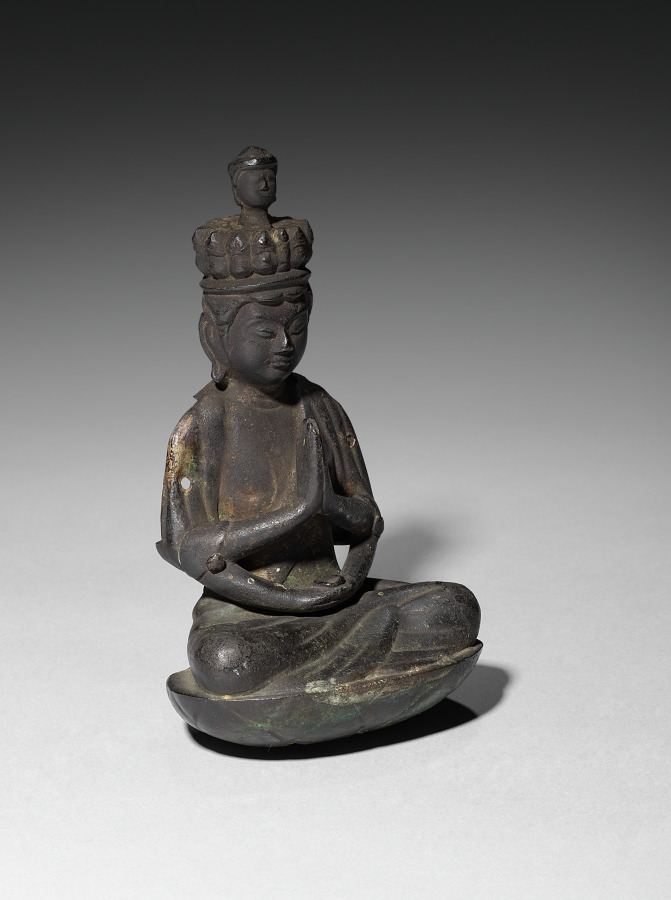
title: Eleven-Headed Kannon (Jūichimen Kannon)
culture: Japan, Heian period (794–1185) to Kamakura period (1185–1333)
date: 1100s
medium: bronze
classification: Sculpture